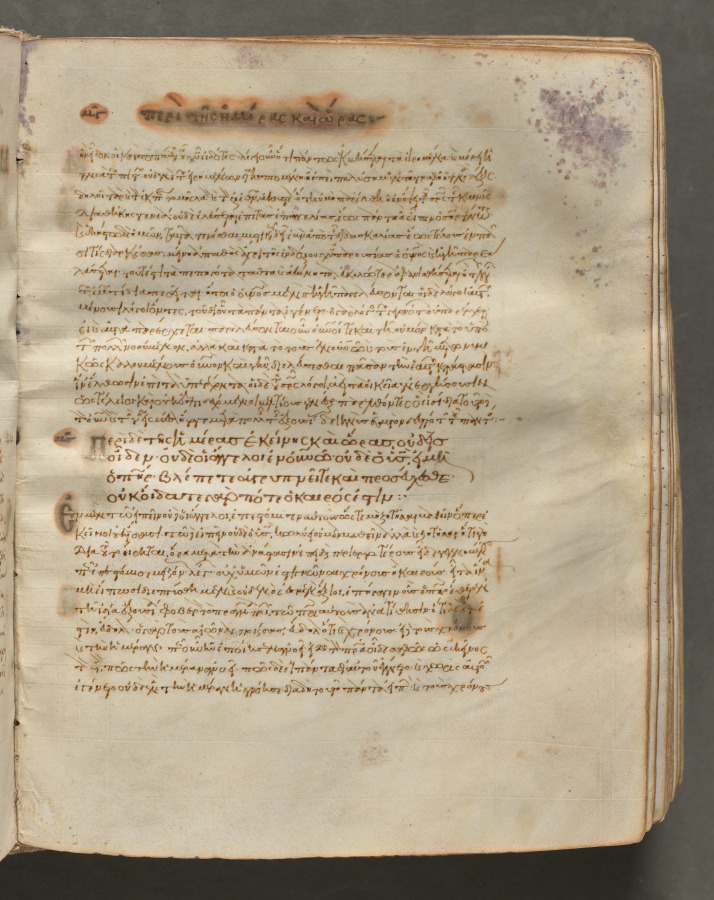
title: Text, folio 185 (recto), from a Gospel Book with Commentaries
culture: Byzantium, Constantinople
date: c. 1000–1100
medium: ink, tempera, and gold on vellum; leather binding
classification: Bound Volume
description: Each of the four gospels in this book opens on a page with brilliantly illuminated borders depicting the author of the text as well as birds-principally peacocks, symbols of the immortality of the soul-and fountains, representing the fountain of life and the salvation of the soul. This volume consists of 428 leaves with texts in Greek. Its level of sophistication suggests that it was probably written and decorated in a monastery in Constantinople.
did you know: Gospel Books were carried in procession through Byzantine churches.